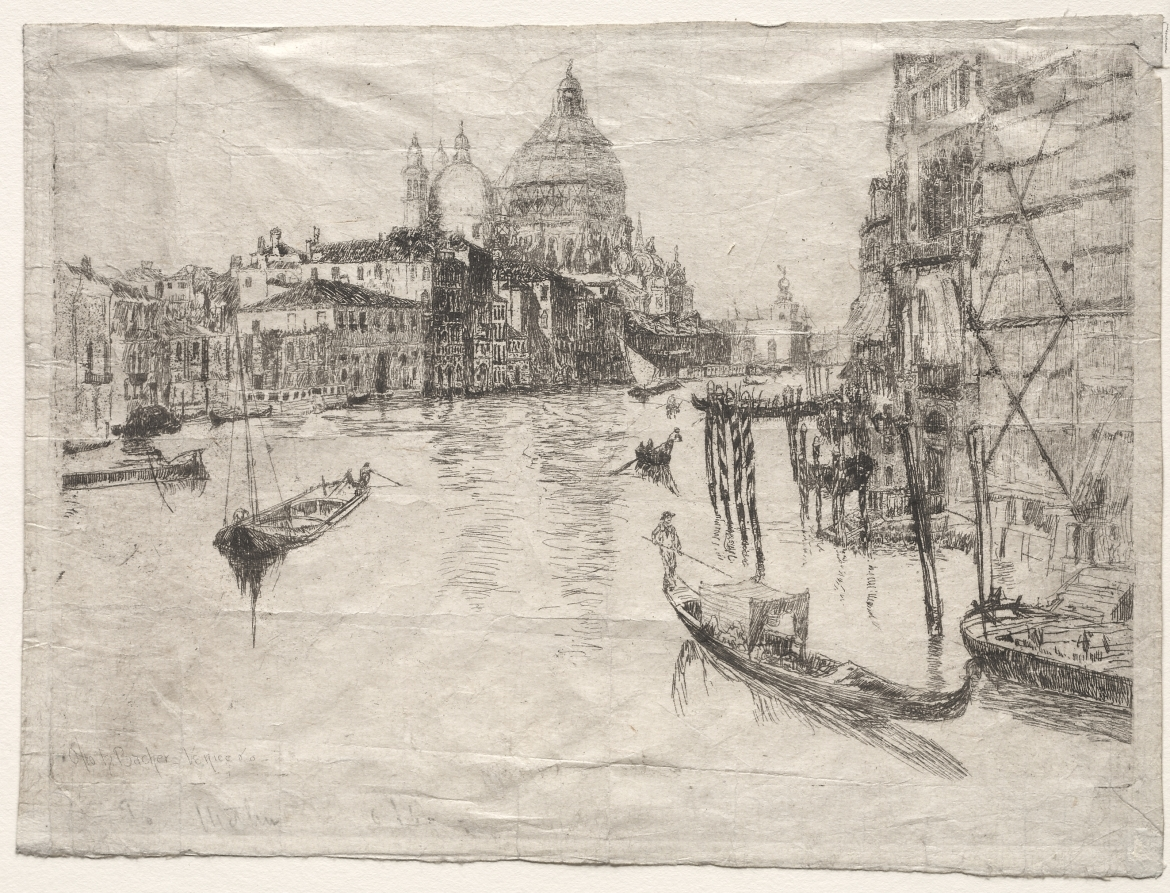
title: Entrance to the Grand Canal, Venice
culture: America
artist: Otto H. Bacher (American, 1856–1909)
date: 1880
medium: etching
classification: Print